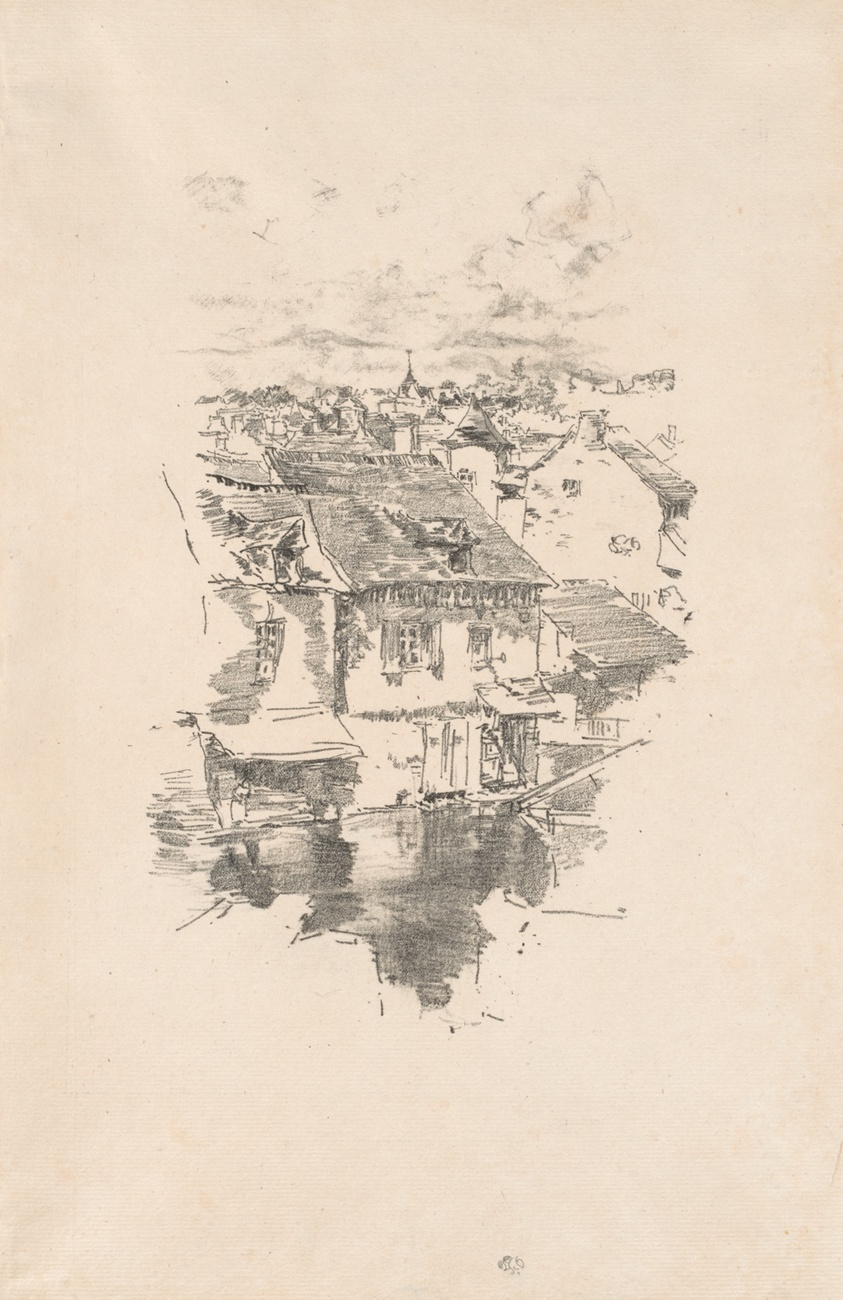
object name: Print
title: Vitré: The Canal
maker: James McNeill Whistler (American, 1834-1903)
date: 1893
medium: Transfer lithograph in black with stumping, on cream laid paper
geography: United States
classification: transfer lithograph; lithograph; print; prints and drawing; paper